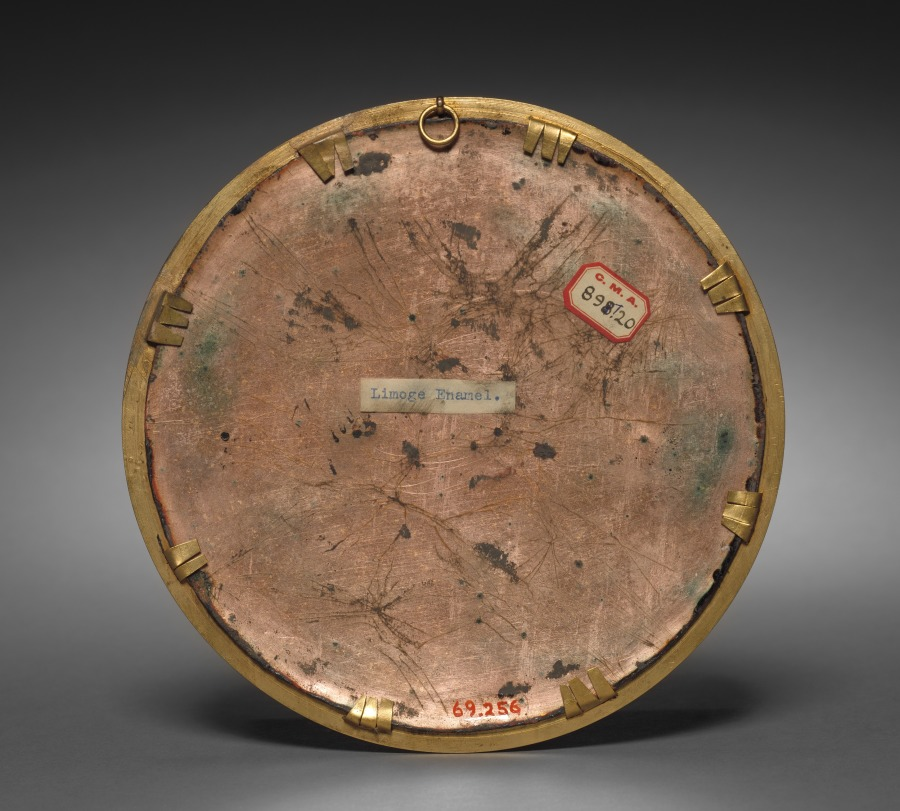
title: Circular Enamel Plaque with Figure of Ecclesia (?)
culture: France, style of Limoges, style of 16th century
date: 16th century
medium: enamel on copper; mounted on molded brass frame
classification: Enamel